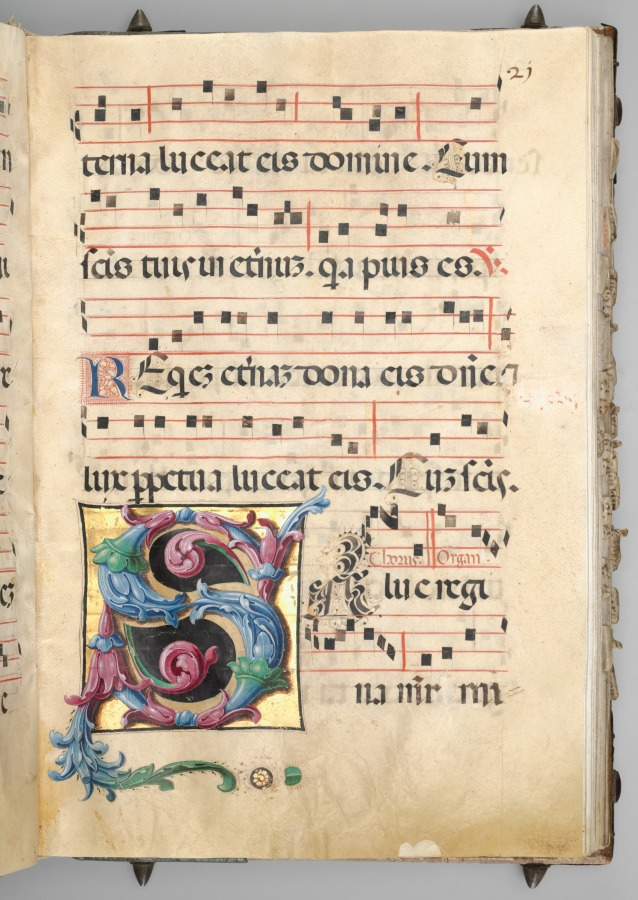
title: Gradual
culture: Italy, Verona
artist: circle of Girolamo dai Libri (Italian, 1474–1555)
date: c. 1520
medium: ink, tempera, and gold on parchment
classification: Manuscript